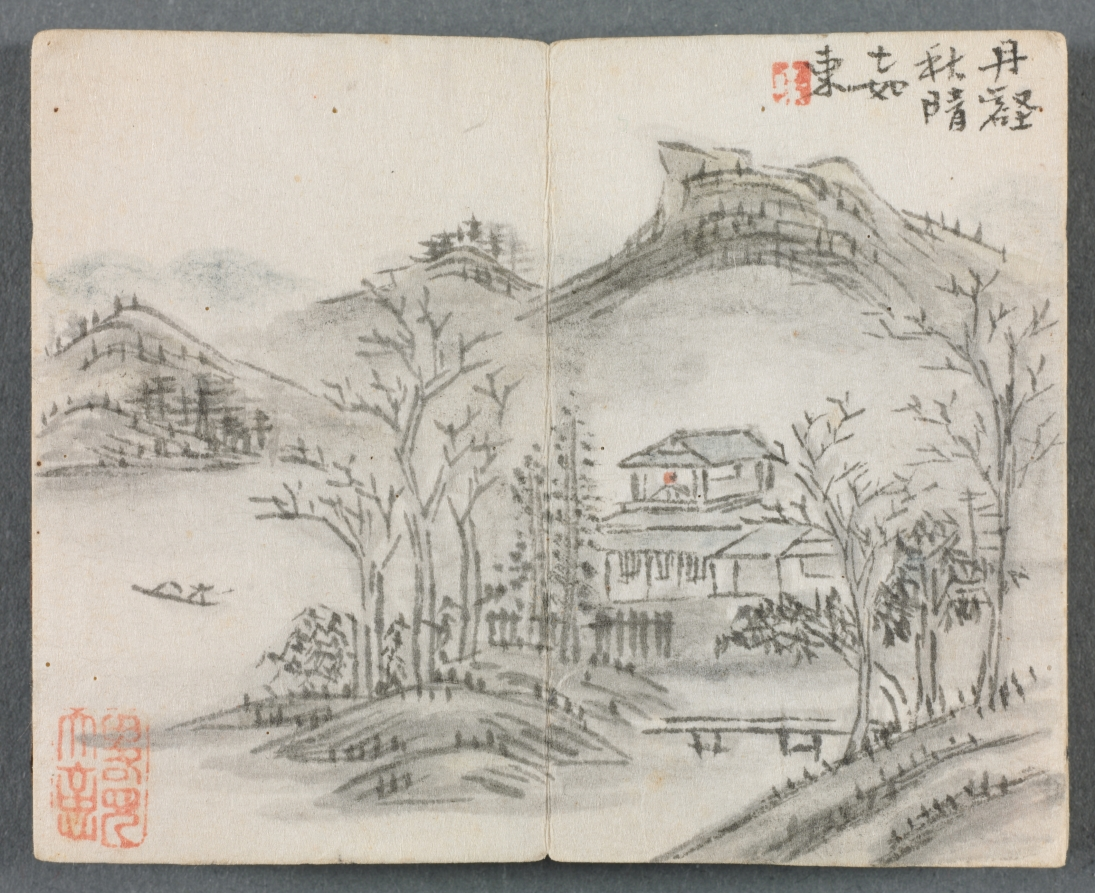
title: Miniature Album with Figures and Landscape (Landscape with Hill, House, Boat and Bridge)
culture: China, Qing dynasty (1644–1911), Qianlong reign (1736–95)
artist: Zeng Yandong (Chinese, c. 1751–1827)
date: 1822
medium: album leaf, ink and color on paper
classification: Painting